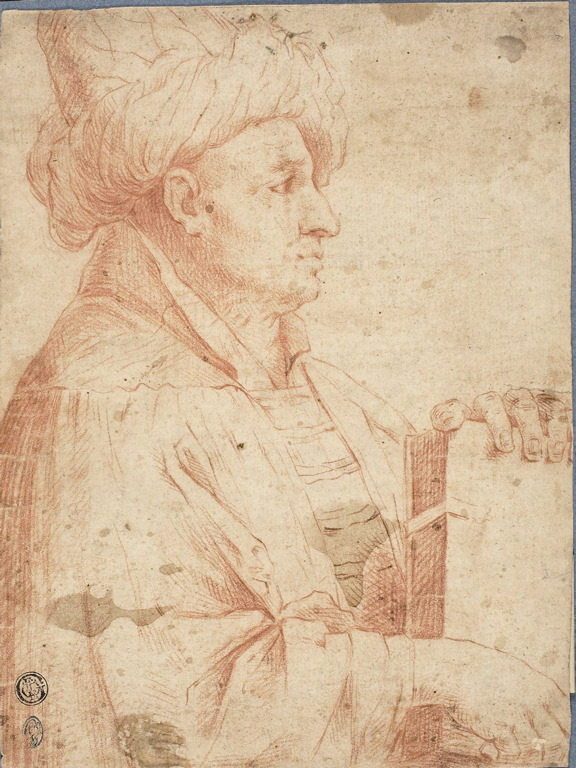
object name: Drawing and Watercolor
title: Bust of Turbanned Man with a Book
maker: After Guercino (Italian, 1591-1666); or Giovanni Bellini (Italian, 1428/30-1516); or after Jacopo Bellini (Italian, c. 1400-c. 1470/71)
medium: Red chalk on cream laid paper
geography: Italy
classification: chalk; drawings (visual works); prints and drawing